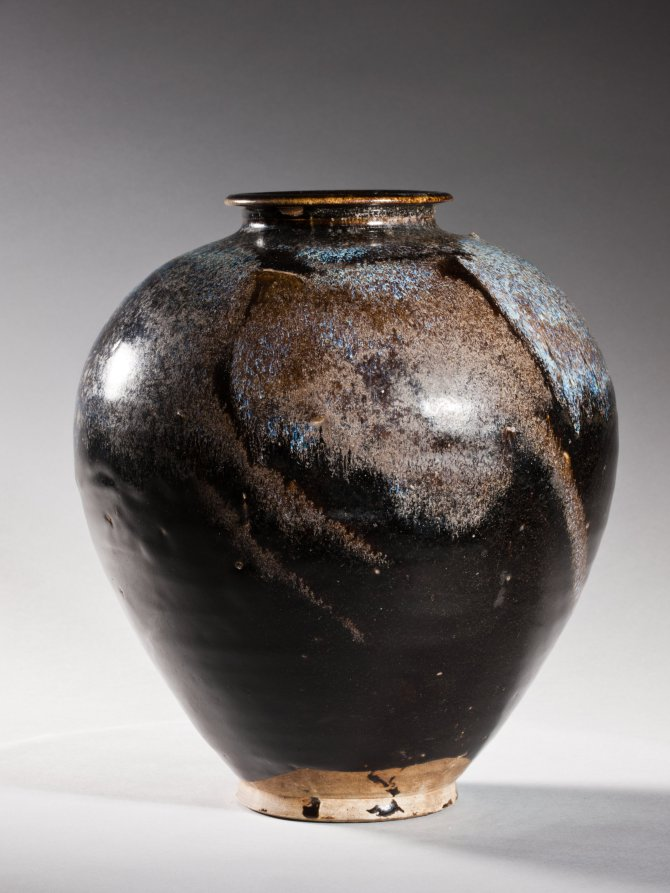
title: Jar: Black Ware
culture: China, Henan province, Huangdao kilns, Tang dynasty (618-907)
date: 700s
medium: glazed stoneware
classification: Ceramic